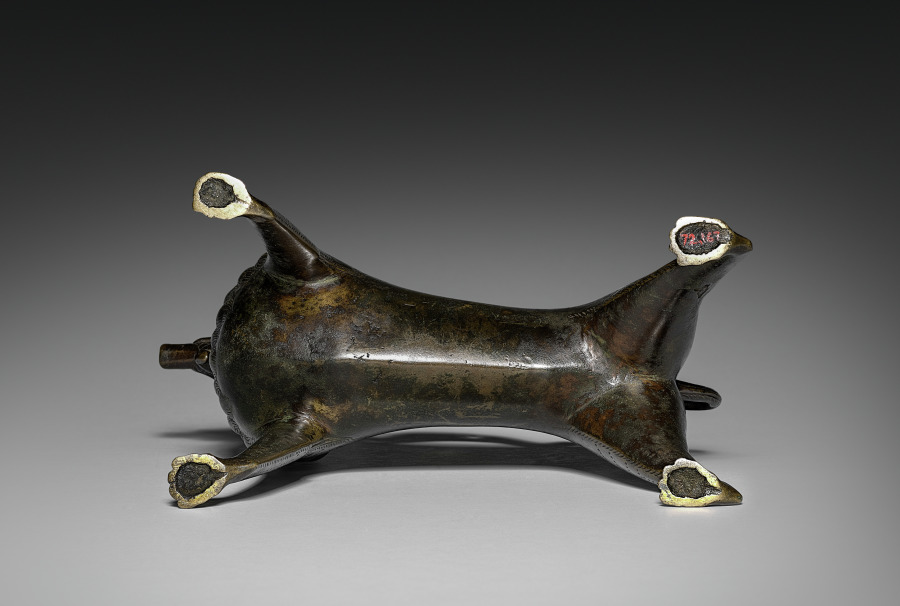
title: Lion Aquamanile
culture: Germany, Lower Saxony, Hildesheim, Gothic period, first half 13th century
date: 1200–1250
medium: bronze: cast, chased, and punched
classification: Sculpture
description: An aquamanile is a water vessel used for washing hands both at church altars and at the dinner tables of upper-class patrons. They often took the form of fantastic beasts such as dragons and unicorns or animals such as horses, birds, dogs, and lions, like this one.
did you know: The handle of this vessel is in the shape of a dragon with a long curving tail.